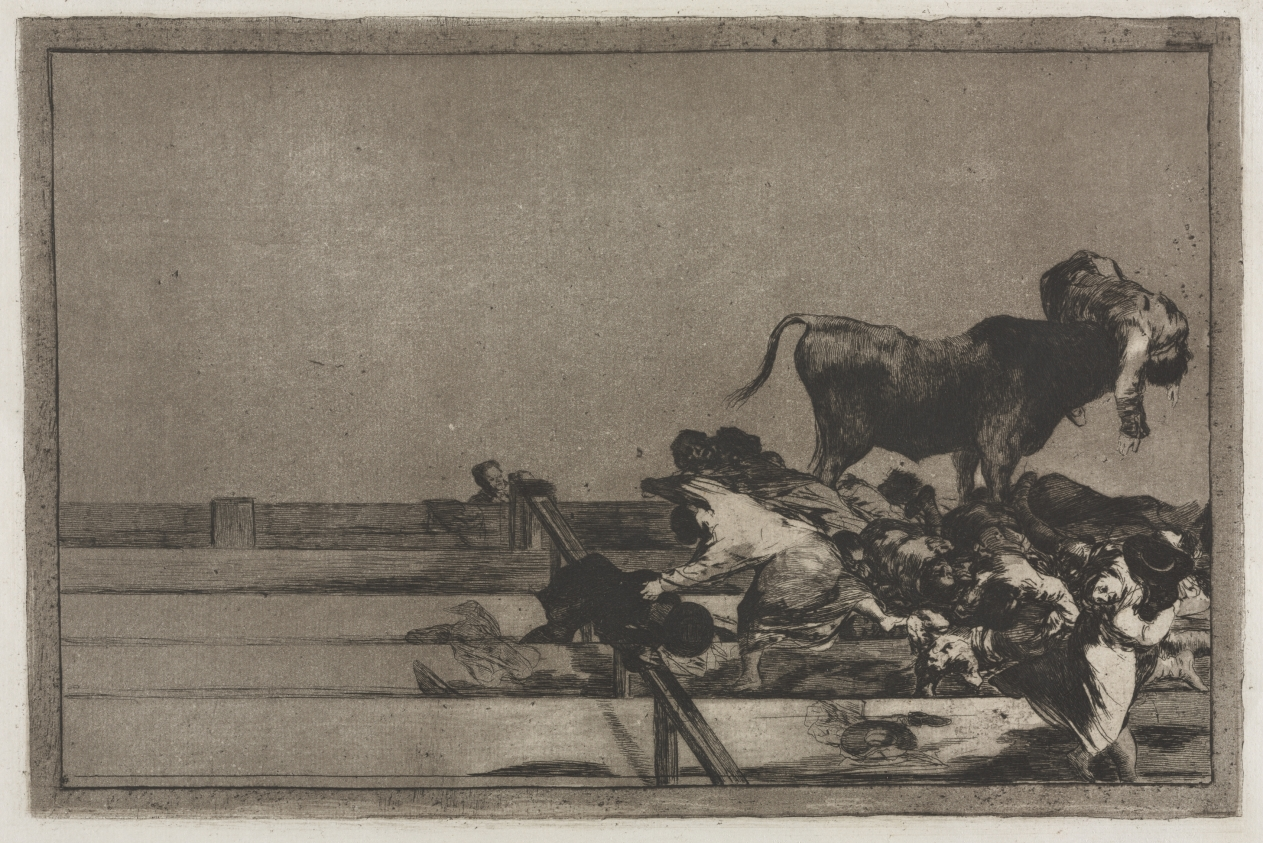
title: Bullfights: Dreadful Events in the Front Rows of the Ring at Madrid and Death of the Mayor of Torrejon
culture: Spain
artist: Francisco de Goya (Spanish, 1746–1828)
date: 1816, printed 1876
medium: engraving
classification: Print